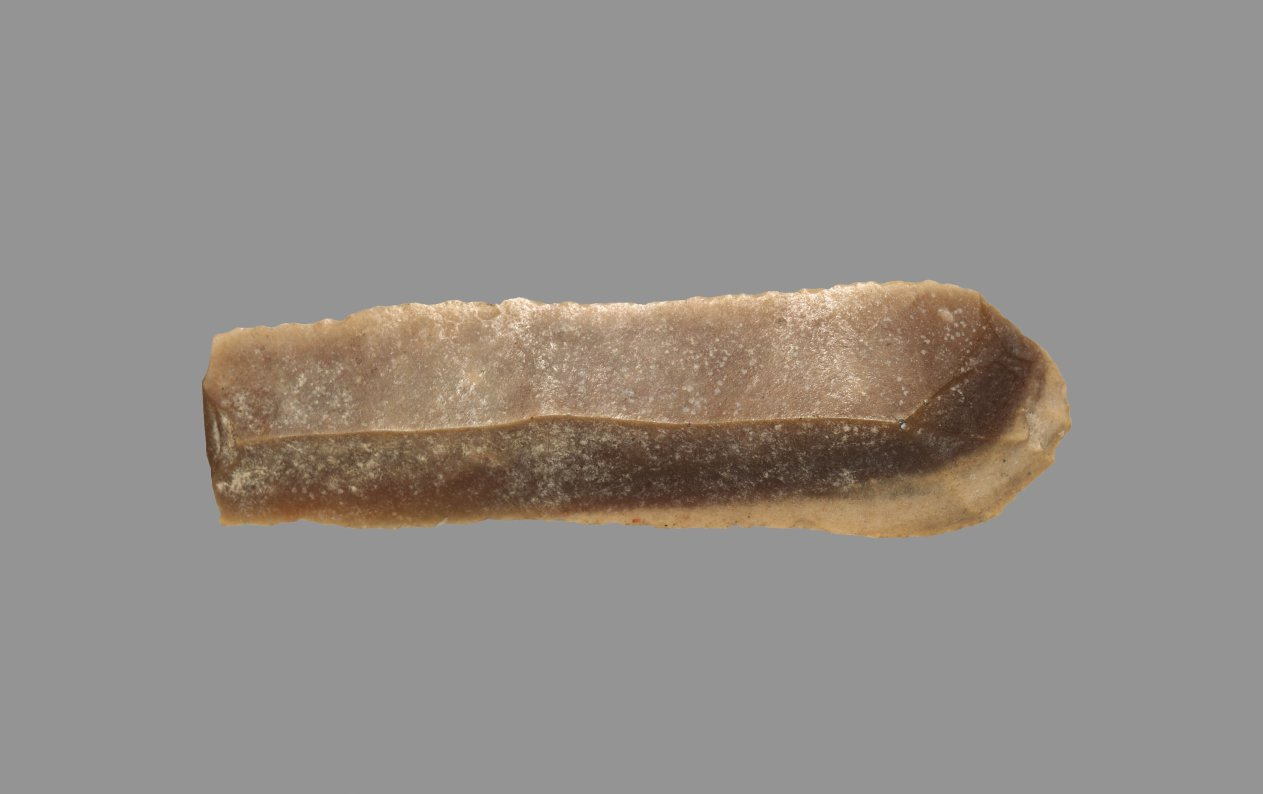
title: Sickle Blade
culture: Egypt, Middle Kingdom (2040–1648 BCE), Dynasty 12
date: 1980–1801 BCE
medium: flint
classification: Implements